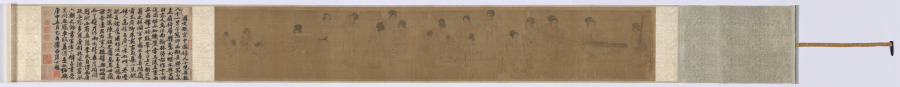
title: In the Palace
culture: China, Southern Song dynasty (1127-1279)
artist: after a work attributed to Zhou Wenju (Chinese, active 942–961)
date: before 1140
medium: Handscroll; ink and light color on silk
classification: Painting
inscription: 1 colophon and 13 seals: 1 colophon and 1 seal of Zheng Cheng 張澂 (d. 1143); 12 seals unidentified.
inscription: Colophon by Zhang Cheng 張澂 (d. 1143): 周文矩宮中圖婦人小兒其數八十，一男子寫神，而粧具、樂器、盆盂、扇椅席、鸚鵡、犬蝶不與。文矩句容人，為江南翰林待詔。作士女體近周昉，而加纖麗。嘗為後主畫南莊圖，號一時絕筆。它日上之朝廷，詔籍之祕閣。宮中圖云是真蹟，藏前太府卿朱載家。或摹以見餽。婦人高髻自唐以來如此。此卷豐肌長襦裙，周昉法也。予至嶠南，於端溪陳高祖之裔，見其世藏諸帝像，左右宮人梳髻與此畧同。而丫鬟乃作兩大鬟，垂 肩項間，雖醜而有真態。李氏自謂南唐，故衣冠多用唐制，然風流寔承六朝之餘。畫家者言辨古畫當先問衣冠車服，蓋謂是也。紹興庚申五月乙酉澹嵒居士題。 印：張澂印章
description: In the Palace depicts 13 ladies of the imperial household, three servants, and six children in fluent baimiao (plain drawing) brushwork, accentuated by color. The women entertain themselves by making music, tending children, and playing with pets. Their elaborate hairstyles, plump figures, and flowing robes are reminiscent of Tang dynasty fashion. The scroll illustrates elegant court life and is a direct copy of the original by Zhou Wenju (active 940–75) from Zhenjiang, Jiangsu province. Zhou was employed at the Southern Tang court in Nanjing under Emperor Li Yu (reigned 961–76), a prolific poet.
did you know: The ladies' elaborate hairstyles, plump figures, and flowing robes are reminiscent of Tang dynasty fashion.